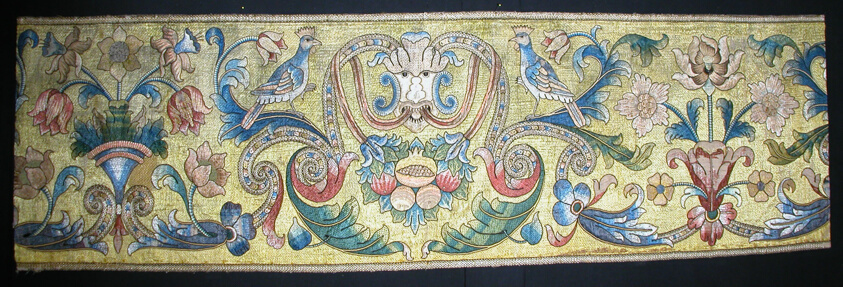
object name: Religious/Ritual Object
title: Altar Frontal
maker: Italy or Portugal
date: Late 17th century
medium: Linen, plain weave; embroidered with silk and linen in leaf, individual satin, satin, split and stem stitches; French knots, laid work, couching and linen padded couching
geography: Italy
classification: textile; needlework (visual works); liturgical; ritual objects